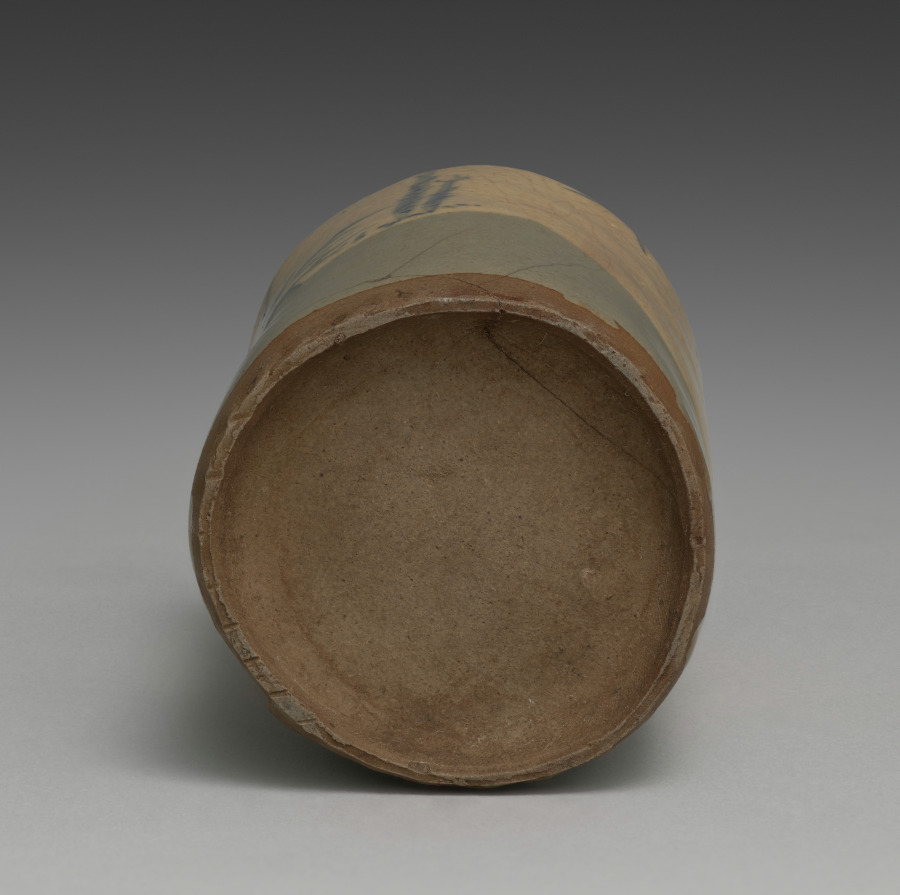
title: Sake Pourer with Bamboo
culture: Japan, Edo period (1615–1868)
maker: attributed to Seifū Yohei I (Japanese, 1801–1861)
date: c. 1844–57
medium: one of a pair of sake flasks; stoneware with white slip, underglaze blue and gold repair (kintsugi) (Kyoto ware)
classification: Ceramic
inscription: The storage box for the pair of vessels is inscribed and impressed with seals.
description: This pair of sake pourers adorned with with bamboo and bellflowers is attributed to the founder of the Seifū Studio, Seifū Yohei I (1801–1861). Yohei I, the lineage founder, was born to the Yasuda family in the city of Kanazawa, which faces the Sea of Japan. His home province of Kaga (in present-day Ishikawa Prefecture) produced its own ceramics, known as Kutani ware, but for his training as a potter, Yohei I chose Kyoto, which produced the more technically advanced porcelainware. He moved to Kyoto around the 1820s and became apprenticed to Nin’ami Dohachi, a leading potter in the city. He later struck out on his own, and it is likely that his teacher gave him the name Seifu Yohei. His works include many exquisitely painted copies of Chinese porcelain, and he also produced stoneware with overglaze color enamels that emulated works in the style of Ogata Kenzan (1663–1743) at which his teacher excelled.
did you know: Sake may be served heated or chilled, and, as with wine, the recommended serving temperature of sake varies greatly by type.